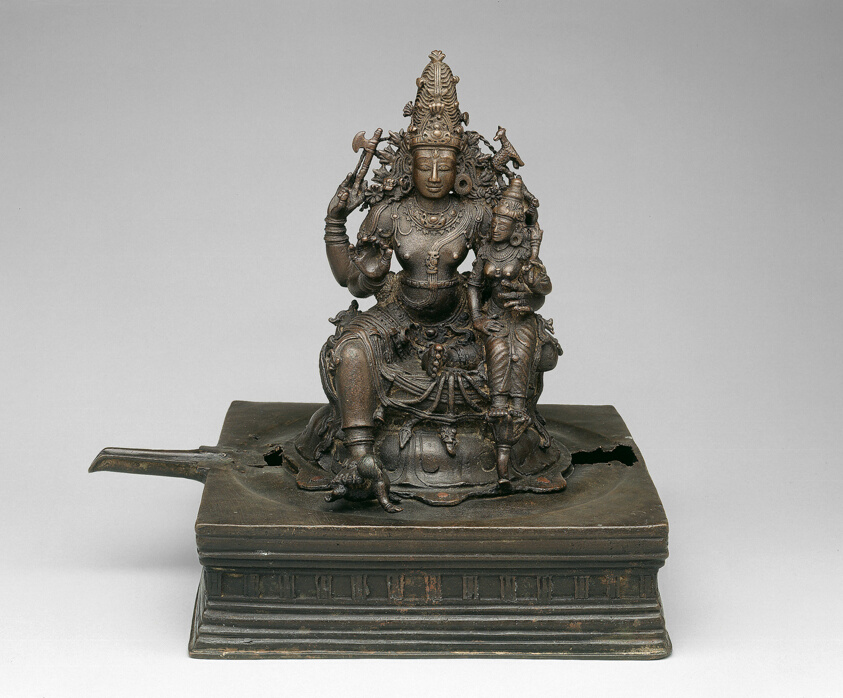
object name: Sculpture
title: God Shiva Seated with His Consort Parvati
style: South Asian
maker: India; Kerala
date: 14th century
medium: Bronze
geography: Kerala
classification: bronze; metal; sculpture; asian art